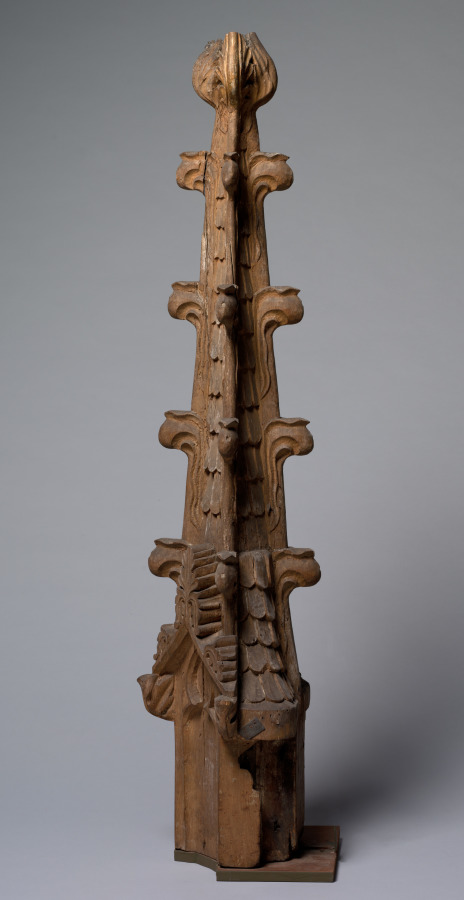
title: Pinnacle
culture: France, 15th century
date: 1400s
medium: oak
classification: Furniture and woodwork